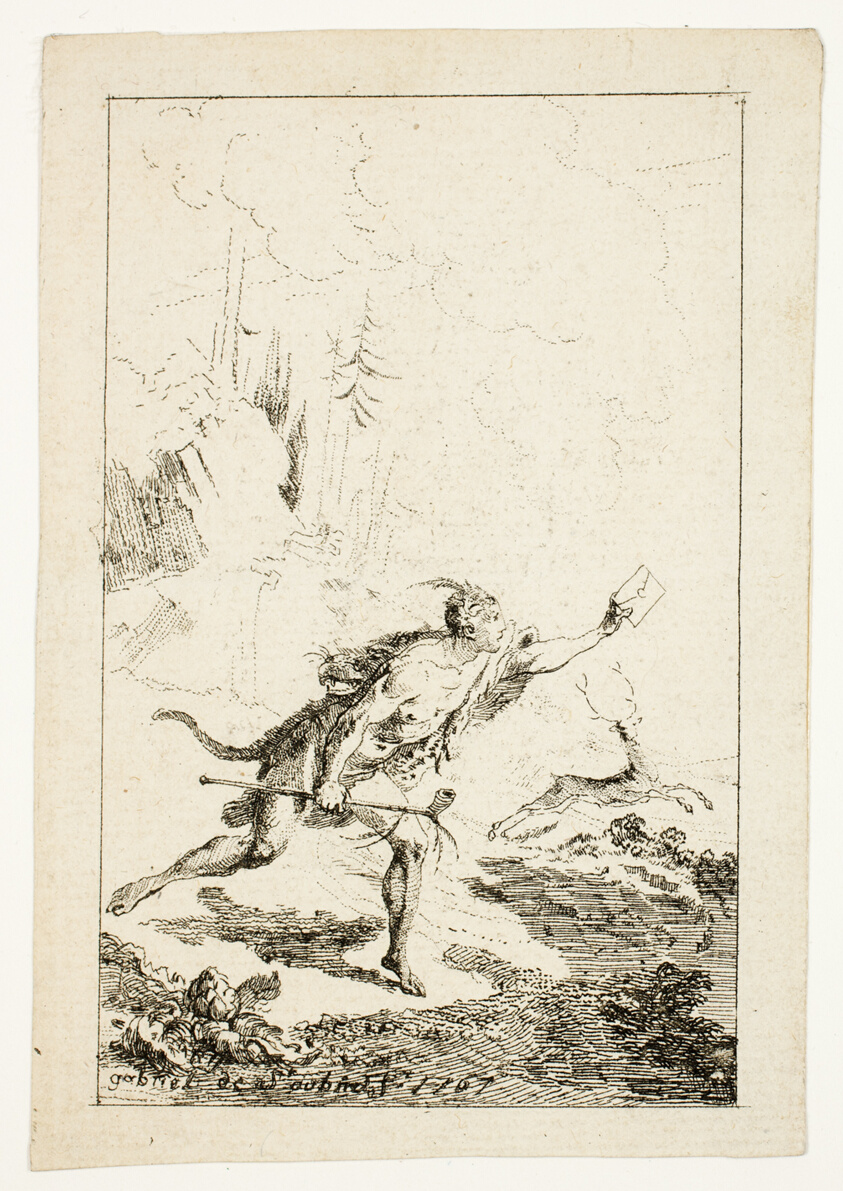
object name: Print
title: Messenger Sent to M. Saint-Denis, by M. Belle-Isle, Prisoner, plate three from Les Nouveaux Voyages aux Indes Occidentales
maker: Gabriel Jacques de Saint-Aubin (French, 1724-1780)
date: 1767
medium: Etching on cream laid paper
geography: France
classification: etching; print; prints and drawing